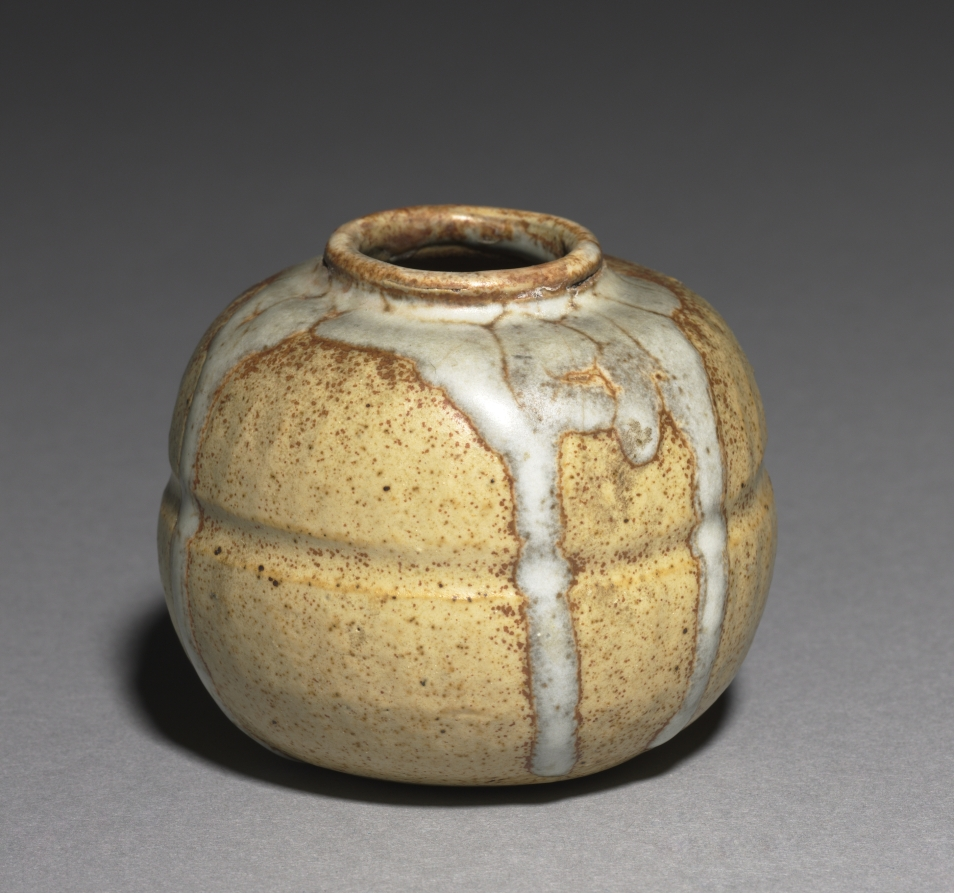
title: Small Pot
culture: France, early 20th Century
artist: Georges Hoentschel (French, 1855–1915)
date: c. 1900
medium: earthenware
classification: Ceramic